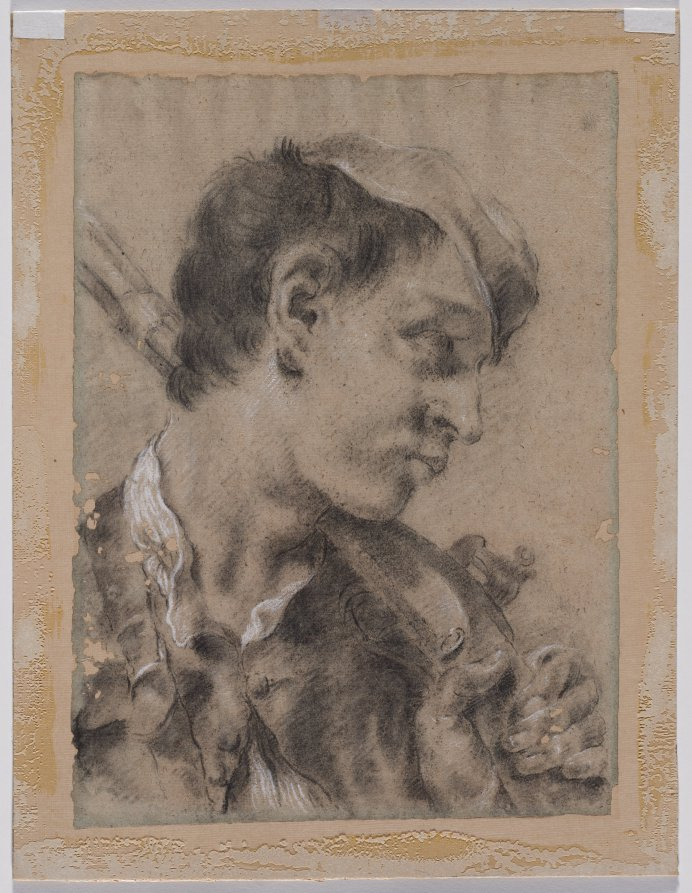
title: Head of a Young Man in Profile with a Gun over His Shoulder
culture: Italy, 18th century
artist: Giovanni Battista Piazzetta (Italian, 1682–1754)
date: c. 1730/40s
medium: black chalk with stumping, heightened with white chalk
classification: Drawing